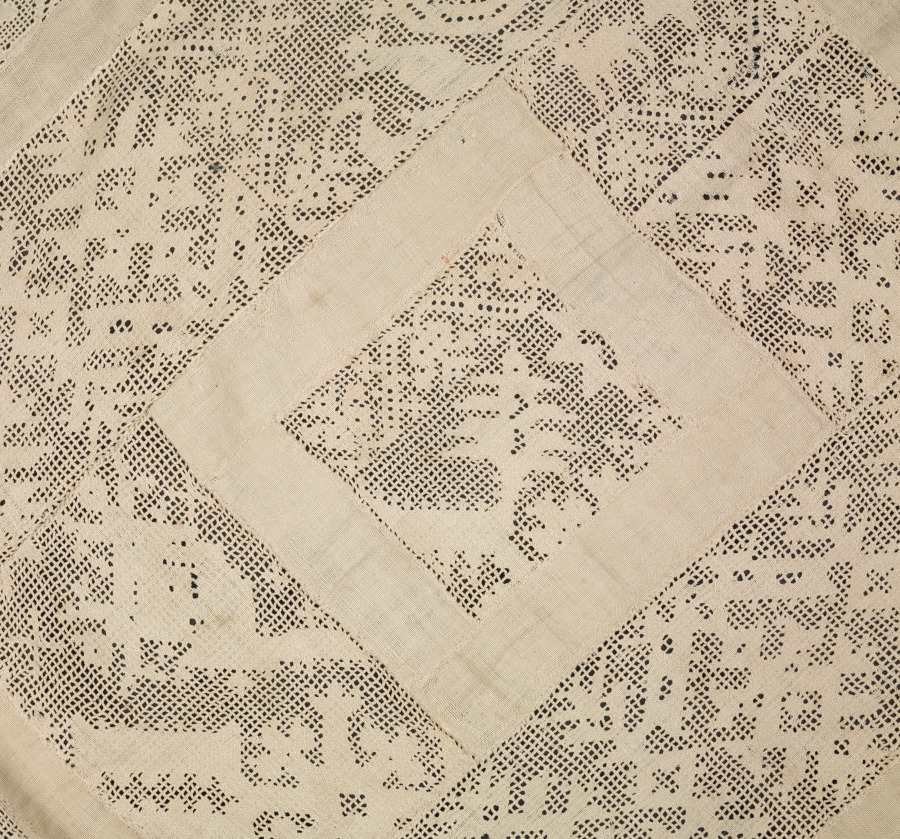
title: Lace Cloth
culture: Italy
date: 1800s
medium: Linen: needle lace (drawnwork)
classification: Lace